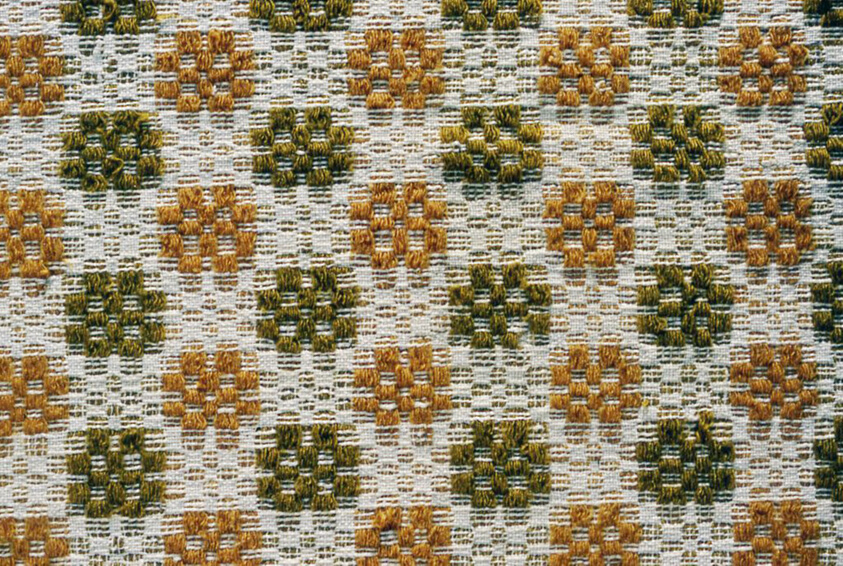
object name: Textile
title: Coverlet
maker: United States, New Hampshire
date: c. 1840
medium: Cotton, linen, and wool, plain weave with supplementary patterning wefts (overshot); one loom width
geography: New Hampshire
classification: textile; coverlet; weaving - coverlet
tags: coverlet